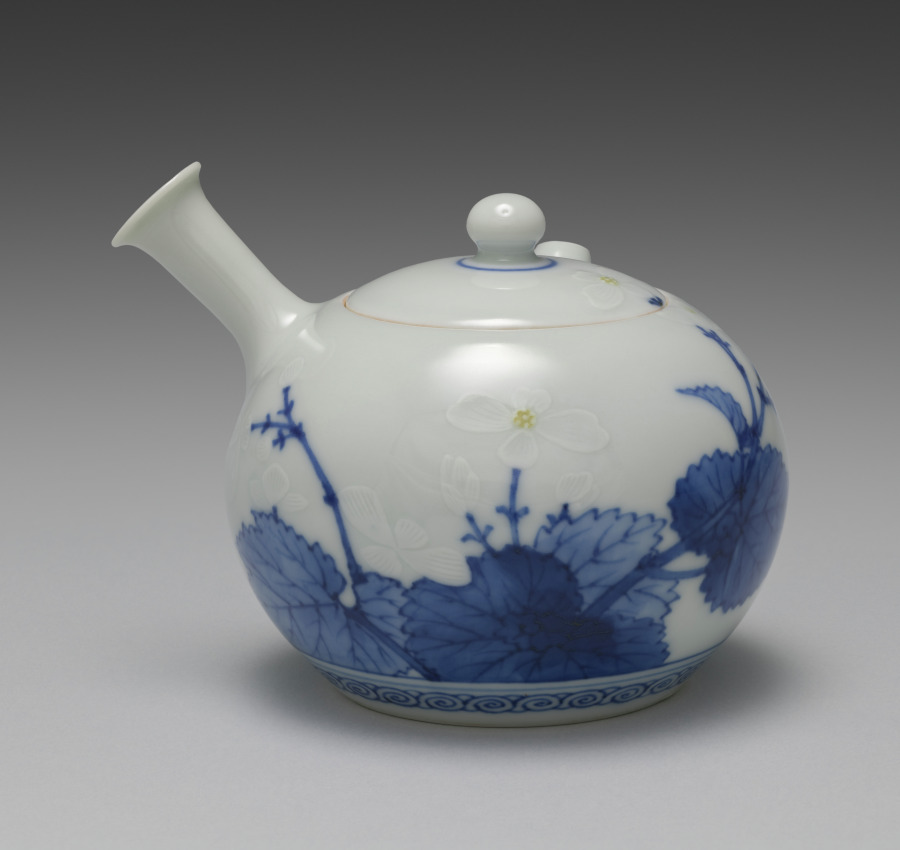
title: Teapot with Begonias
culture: Japan, Meiji period (1868–1912)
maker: Seifū Yohei III (Japanese, 1851–1914)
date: 1897–1914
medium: Porcelain with underglaze and overglaze colors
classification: Ceramic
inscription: 清風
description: This teapot has complex surface treatment: a design of begonias in modulated underglaze blue for the leaves and stems as well as thick overglaze white with incised lines to define the petals, plus small areas of underglaze yellow at their low-relief centers. A band of underglaze blue gives further definition to the lid’s handle, and the area just above the base has a double band of blue above a row of snail-shell curls. Unlike many other teapots, which have marks on their bases, this one has “Seifu” incised into one of its sides in relatively large characters. It is the side that would face the host if the teapot were held by the handle with the right hand, which would be the expectation.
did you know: This teapot with begonias combines underglaze blue with subtle use of yellow and white enamels.